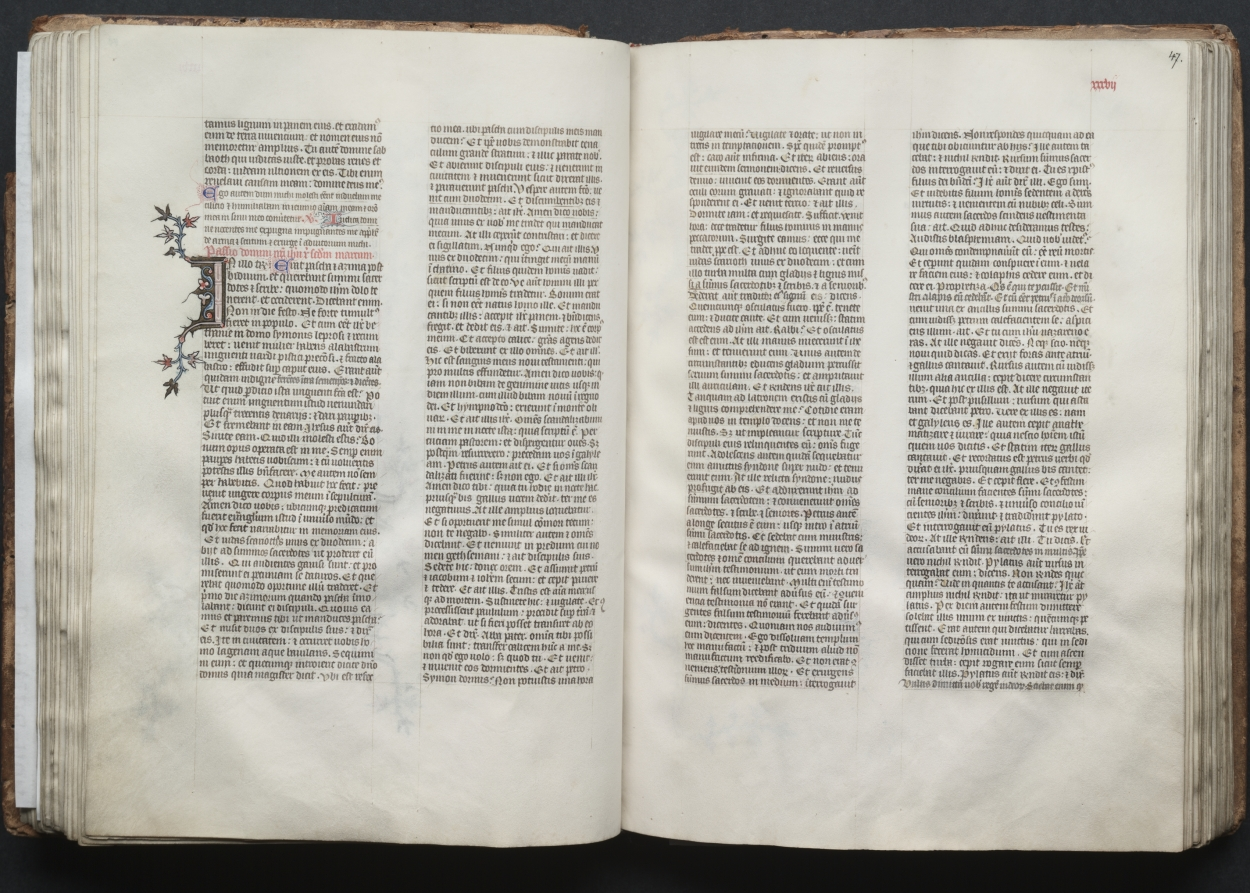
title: The Gotha Missal: Fol. 47r, Text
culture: France, Paris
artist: Master of the Boqueteaux (French)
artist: and Workshop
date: c. 1375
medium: ink, tempera, and gold on vellum; blind-tooled leather binding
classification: Bound Volume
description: The style and quality of this manuscript's decoration is typical of deluxe Parisian books made for aristocratic or royal patrons. Most of the book's decoration appears to be the work of the Master of the Boqueteaux, an artist active at the court of King Charles V (died 1380). His style was apparently shared by a number of book illuminators working in and around Paris. It is very possible that the Gotha Missal belonged to Charles V, but is not provable because the manuscript has no royal portraits and lacks a colophon. Given the book's magnificent decoration, however, it would seem that it was produced for a Valois prince, if not for the king himself. The manuscript receives its name from the German dukes of Gotha, its later owners.